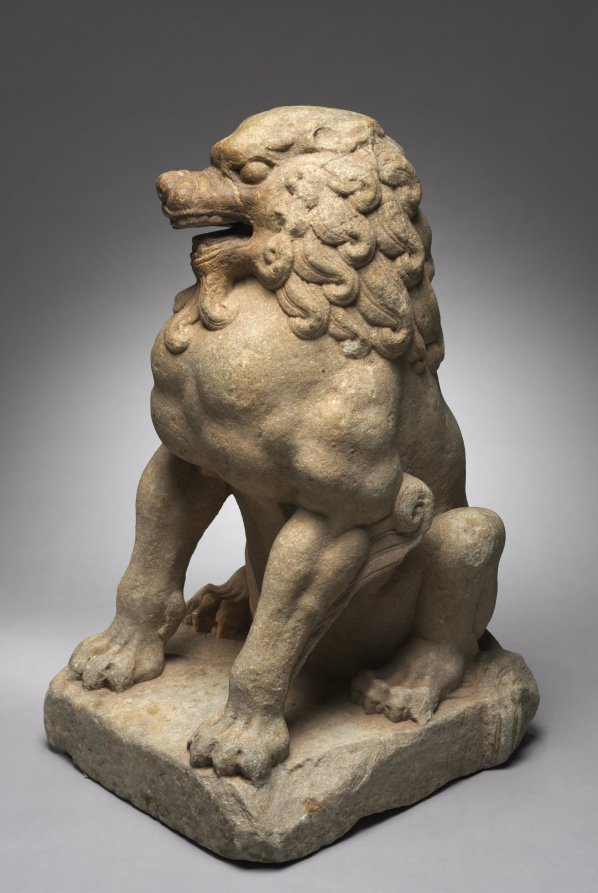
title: Guardian Lion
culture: China, Tang dynasty (618-907)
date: c. 600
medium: white marble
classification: Sculpture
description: Lion sculptures like this example are often found at the entrance to Buddhist temples in China. It may seem as if they are there to protect the temple. Lions also have had strong associations with Buddhism since the religion’s origin; the dharma, or Buddhist doctrine, is said to be spread through his roar.